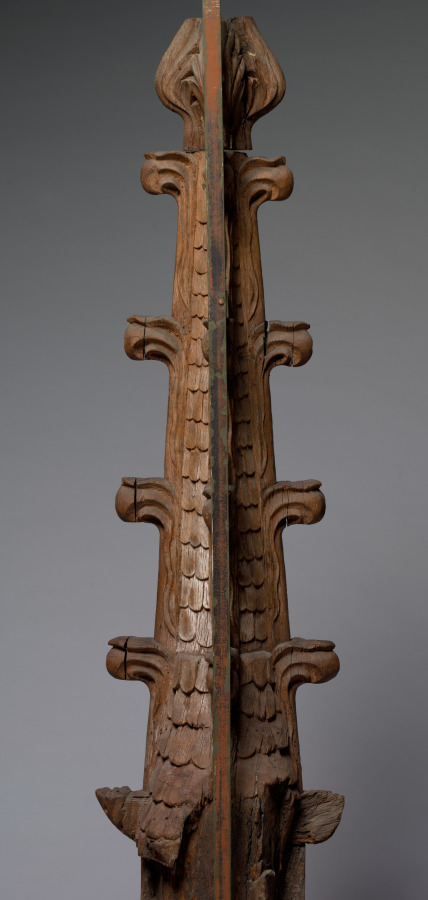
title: Pinnacle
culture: France, 15th century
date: 1400s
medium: oak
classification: Furniture and woodwork